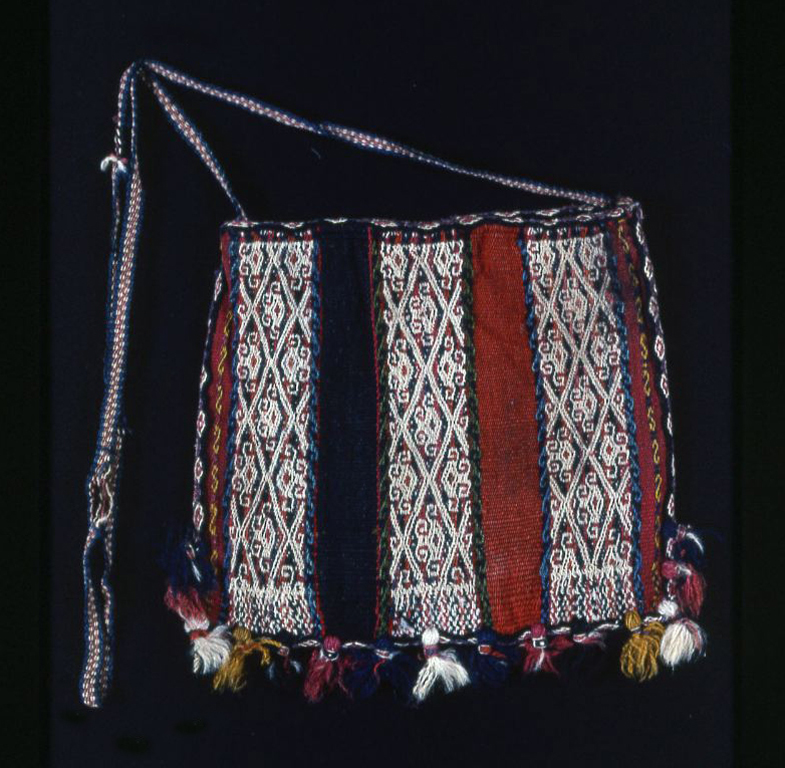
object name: Textile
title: Coca Bag (Chuspa)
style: aymará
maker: Aymara (Bolivia, Oruro, Ladislao Cabrera, Pampa Aullagas region)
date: 1850/1900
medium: Wool, stripes of plain weave and two-color complementary warp weave; edge overcast and interlaced in crossed warp weave; strap: plain weave; wrapped tassels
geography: Bolivia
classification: textile; weaving; accessories (object genre); costume accessory; costume accessory - bag